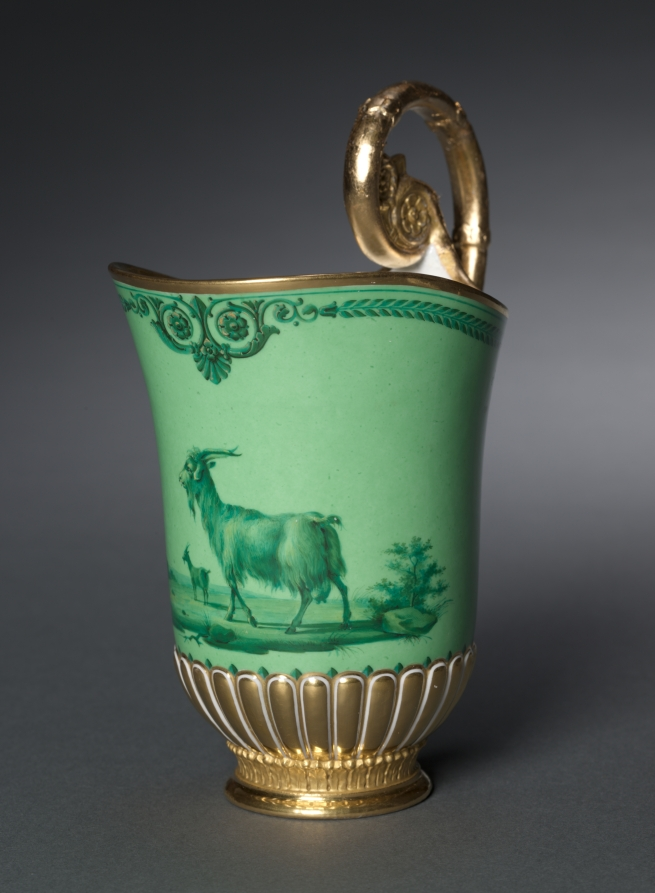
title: Cream Jug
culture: France, 18th-19th century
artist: Sèvres Porcelain Factory (French, est. 1756)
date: designed 1788, made 1831–1834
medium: gilt porcelain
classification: Ceramic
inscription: R...R(?)-34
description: The pattern for this cream jug was originally designed for Marie-Antoinette, queen of France, in 1788